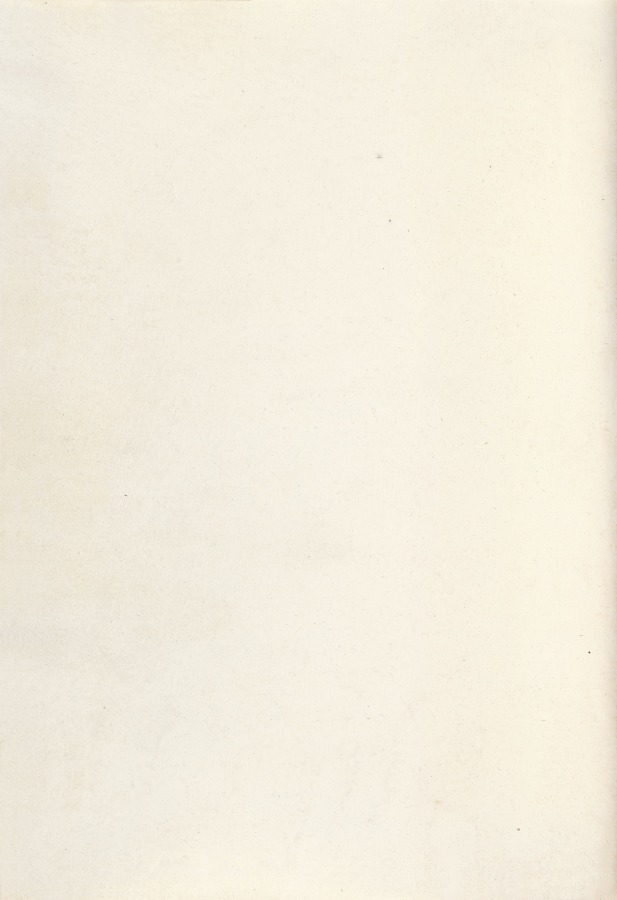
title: Hours of Queen Isabella the Catholic, Queen of Spain: Fol. 280v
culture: Flanders, Ghent and Bruges, late 15th century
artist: Master of the First Prayerbook of Maximillian (Flemish, c. 1444–1519)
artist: and Associates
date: c. 1500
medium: ink, tempera, and gold on vellum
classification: Bound Volume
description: This manuscript was illuminated by a circle of at least five highly organized manuscript painters active in the Flemish cities of Ghent and Bruges. The principal illuminator was Alexander Bening, who painted the majority of the book's miniatures. Manuscripts produced by this circle of artists are renowned for the decoration of their borders, which typically feature a rich variety of realistically-painted flowers, birds, and butterflies. This prayer book, called a book of hours, was intended not for a cleric, but for the private devotions of a lay person-in this case, Isabella the Catholic, Queen of Spain (1451-1504). Isabella's coat of arms embellishes the book's frontispiece. It is unlikely that the book was commissioned by the Queen herself; rather, she probably received it as a diplomatic gift from someone courting her patronage, perhaps Cardinal Francisco Jimenez de Cisneros. A Franciscan friar, Jimenez was dependent upon Isabella for his advancement, first to the post of Queen's confessor in 1492, and then to Archbishop of Toledo in 1495.